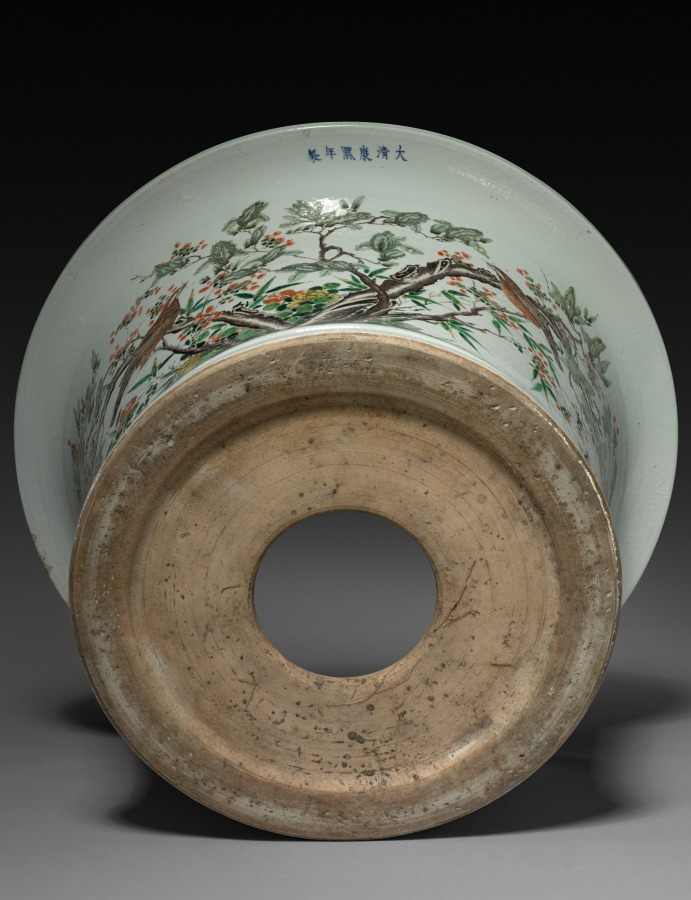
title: Jardiniere with Birds on Flowering Branches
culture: China, Jiangxi Province, Jingdezhen kilns, Qing dynasty (1644–1911), Kangxi reign (1661–1722)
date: 1662–1722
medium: porcelain with famille verte overglaze enamel decoration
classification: Ceramic